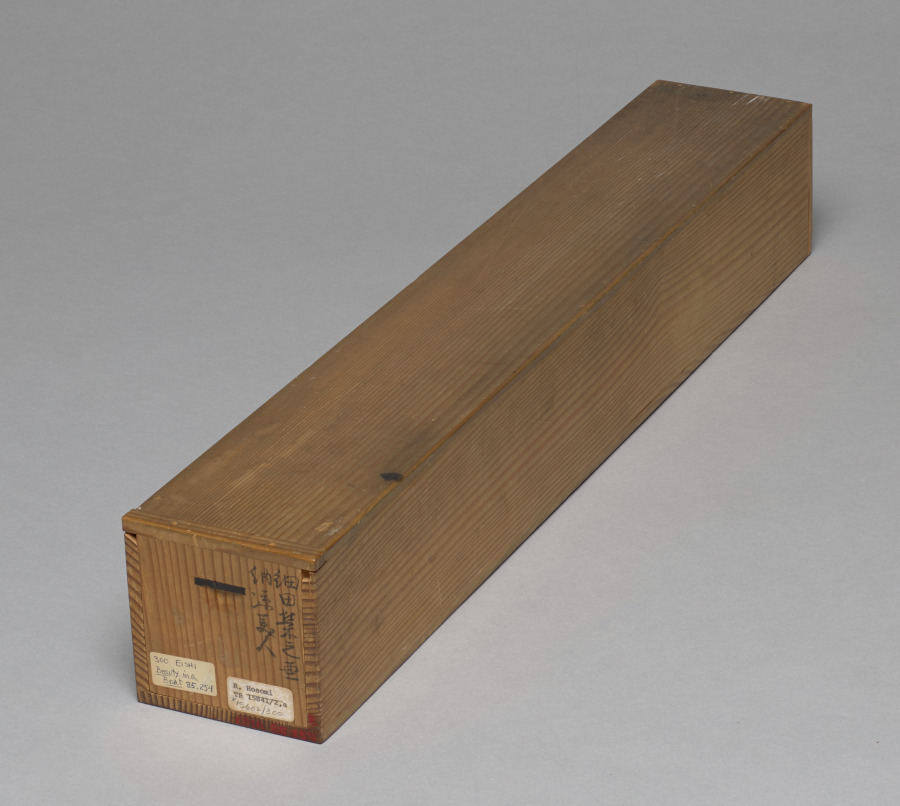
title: Beauty in a Boat on Sumida River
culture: Japan, Edo period (1615–1868)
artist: Chōbunsai Eishi (Japanese, 1756–1829)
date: c. 1801–4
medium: hanging scroll; ink and color on silk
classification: Painting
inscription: artist's signature 栄之筆 and seal, lower right.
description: The Sumida River was a popular refuge from the heat and humidity of the city during the summer. One can see the torii gate of Mimeguri Shrine just to the left of the woman's fan.